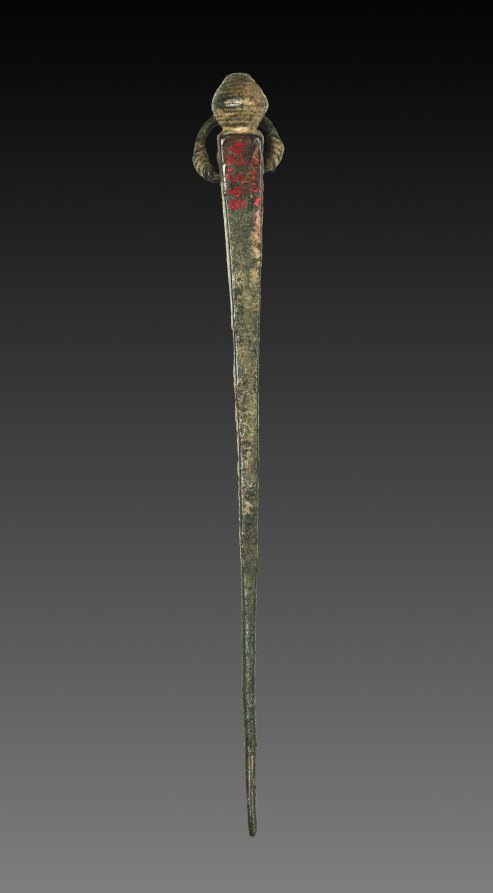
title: Cotter Pin for Chariot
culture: Iran, Luristan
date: 2000–1000 BCE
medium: bronze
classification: Metalwork